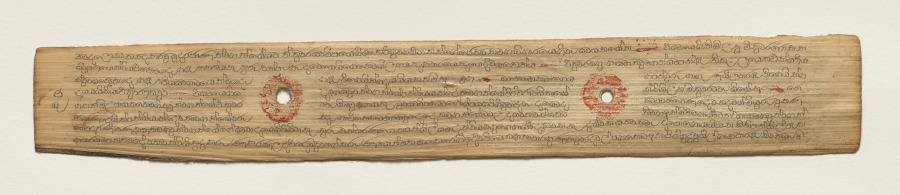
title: Leaf from a Buddhist Manuscript (recto)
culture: Sri Lanka, Singhalese, Late 17th century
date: c. 1700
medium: fiber paper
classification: Manuscript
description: Palm leaf material is still used for manuscripts in Sri Lanka. The palm leaves are prepared first by boiling them, drying them in the sun, and then rubbing them with oils. Scribes then use a metal stylus to incise the text. Then charcoal powder is wiped across the pages, filling in only the inscribed lines.